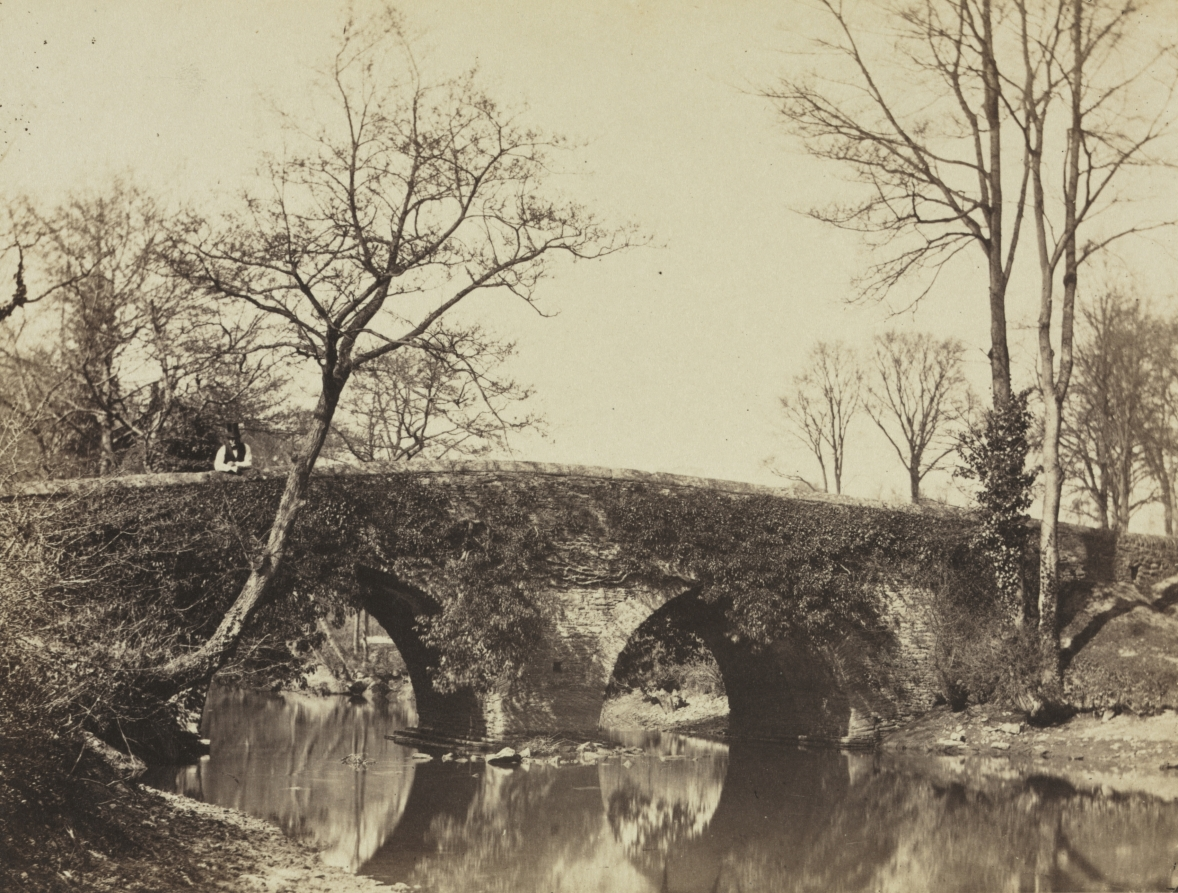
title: The Country Bridge (Staplylton Bridge, Bristol)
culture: England, 19th century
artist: John Dillwyn Llewelyn (British, 1810–1882)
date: c. 1854– 1857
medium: albumen print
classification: Photograph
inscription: written in pencil on verso of mount: "13838-4.09/The Country Bridge/John Dillwyn Llewelyn"